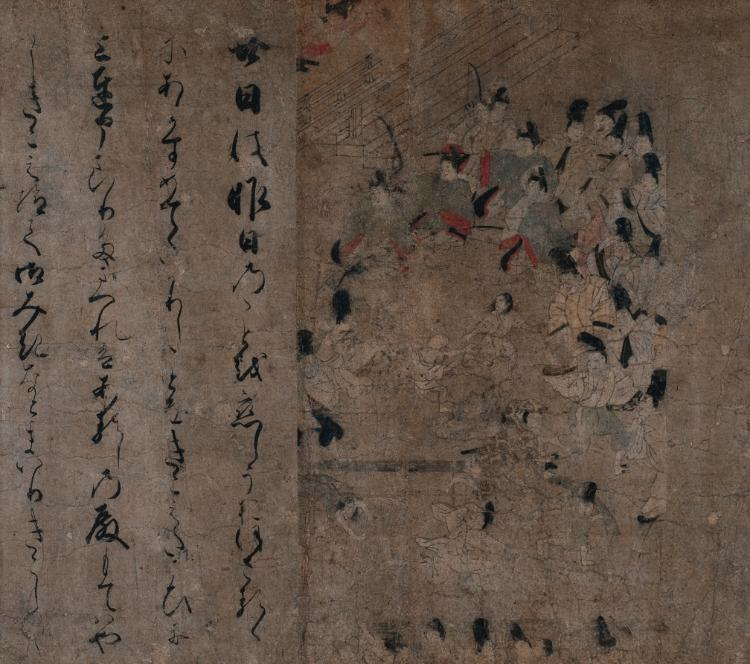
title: The Emperor's Attendance at the Horse Race: Episode from the Tale of Eiga (Eiga Monogatari)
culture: Japan, Kamakura period (1185–1333)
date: c. 1200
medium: handscroll; ink and color on paper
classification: Painting